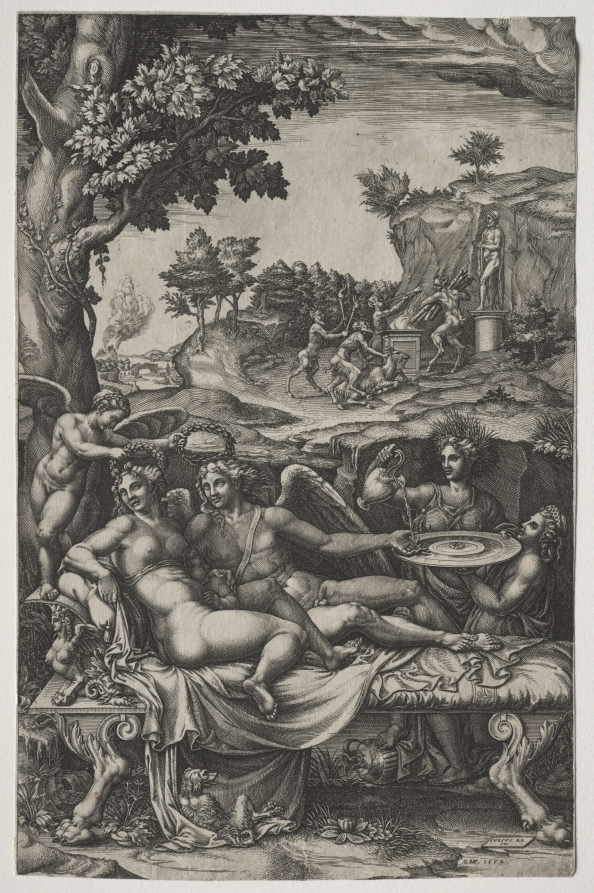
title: Cupid and Psyche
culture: Italy, 16th century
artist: Giorgio Ghisi (Italian, 1520–1582)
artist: after Giulio Romano (Italian, 1492/99–1546)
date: 1574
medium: engraving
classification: Print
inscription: lower right, in tablet, in plate: IVLIVS RO. / IN. ; lower right, in plate: .G.MF. 1574. ['G.MF' in monogram; '4' is engraved over the number '3'] ; VERSO, lower right, in graphite: 090 ; lower center, in graphite: JI 30 S 51 ; lower center, in graphite: B45i ; lower center, in graphite: 45[underlined] ; lower right, in graphite: f[?]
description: Crowned with laurel wreaths, Cupid and Psyche recline on a couch with their daughter Voluptas between them. Ceres, goddess of fertility and abundance, pours water on Cupid’s hand. The scene is derived from a story by Apuleius (about AD 124–170) narrating Psyche’s adventures leading up to her marriage to Cupid. The rich contrasts of light and shadow that Ghisi achieved in this engraving make this print especially sensual and luxurious. It reflects his later style and the different textures he was able to achieve in human bodies, silky drapery, and lush foliage.